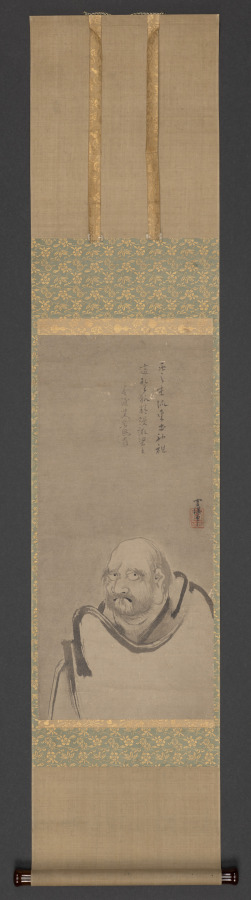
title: Bodhidharma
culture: Japan, Muromachi period (1392–1573)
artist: Unkei Eii (Japanese, active 1504–1520)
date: early 1500s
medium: hanging scroll; ink on paper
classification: Painting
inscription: signed: "Unkei" two-line inscription signed: Shunpō Sōki (1416-1496), 40th abbot of Daitokuji temple